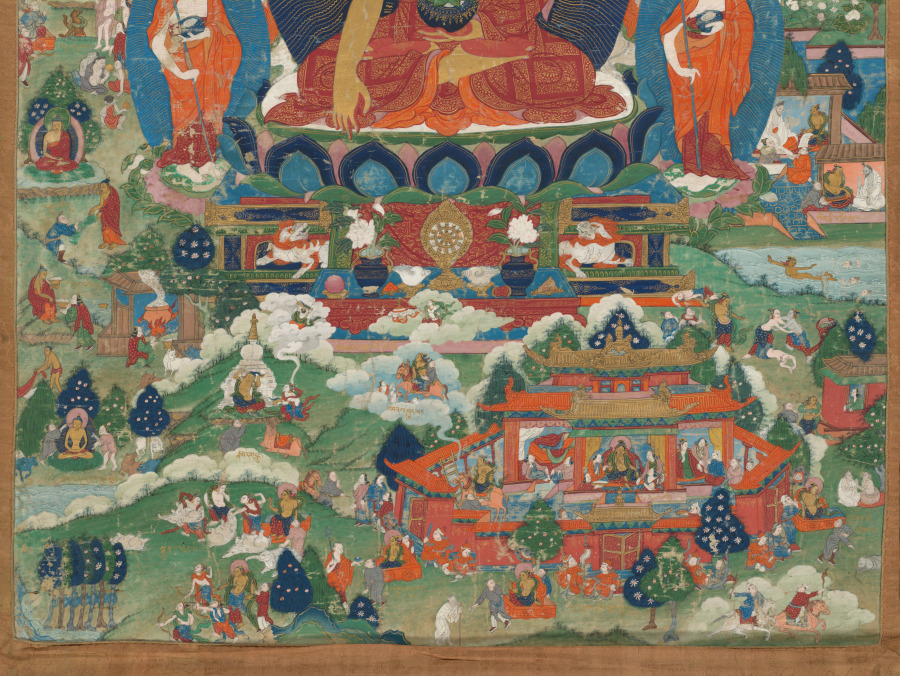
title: Shakyamuni Buddha with scenes from his life story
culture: Tibet, Qing dynasty (1644–1911)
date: c. 1700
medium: gum tempera on cloth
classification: Painting